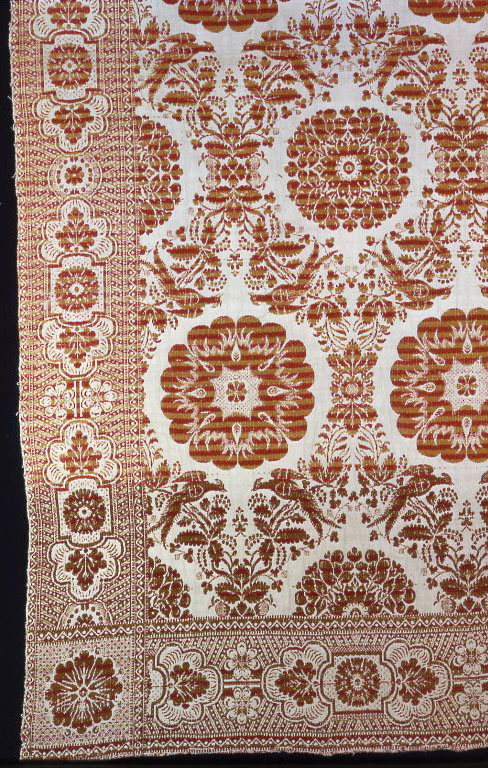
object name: Textile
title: Coverlet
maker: United States, New York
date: 1840/45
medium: Cotton and wool, plain weave with plain interlacings of secondary binding warps and patterning wefts (Beiderwand); woven on loom with Jacquard attachment; two loom widths joined; fringed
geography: New York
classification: textile; coverlet; weaving - coverlet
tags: coverlet